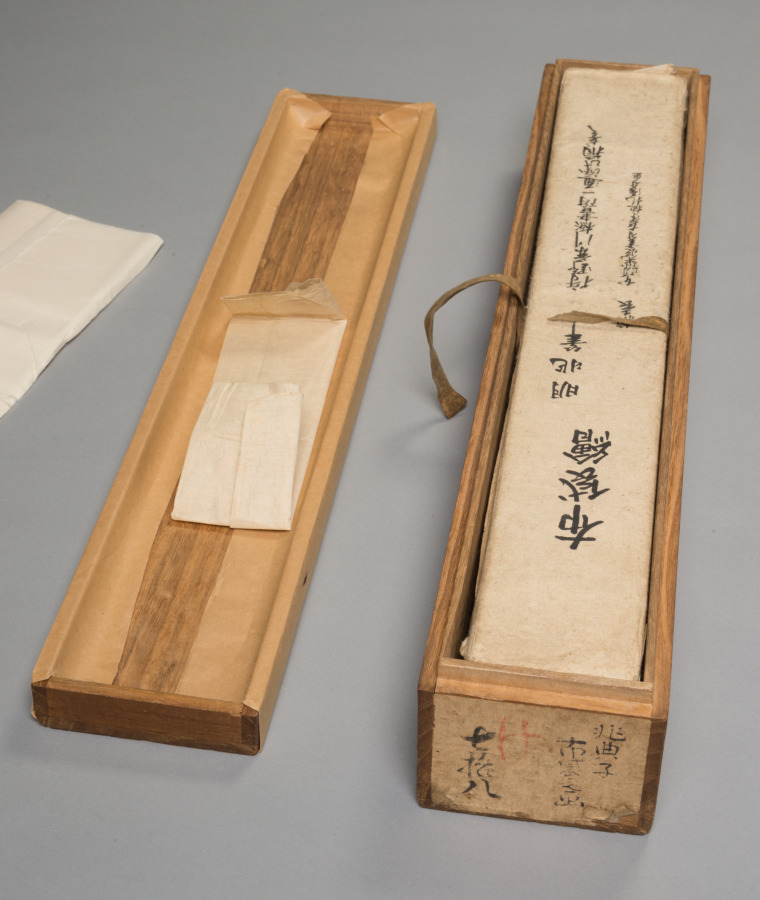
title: Hotei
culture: Japan, Muromachi period (1392–1573)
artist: Kichizan Minchō (Japanese, 1352–1431)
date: late 1300s–early 1400s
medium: hanging scroll; ink and slight color on paper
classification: Painting